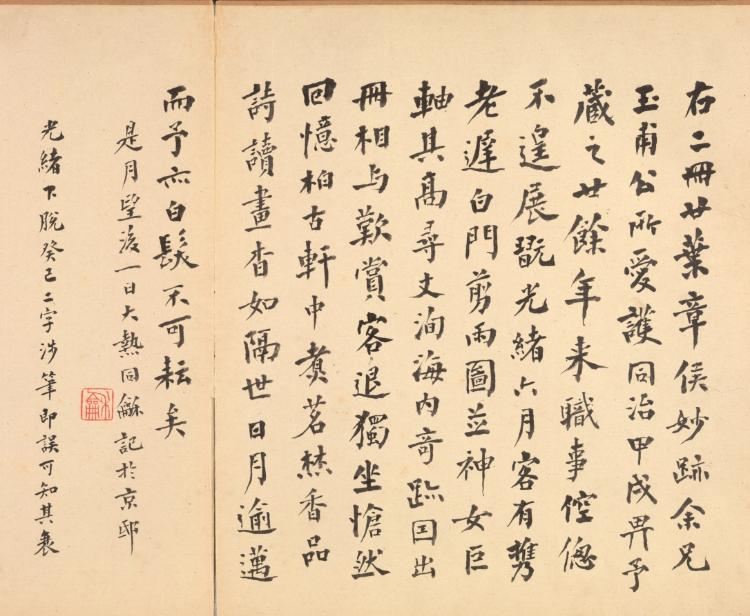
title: Paintings after Ancient Masters: Calligraphy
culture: China, Ming dynasty (1368–1644)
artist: Chen Hongshou (Chinese, 1598/99–1652)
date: 1598–1652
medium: album leaf, ink and color on silk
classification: Painting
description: The twenty paintings in this double album by Chen Hongshou include landscapes, figures, and flowers. It also has one leaf featuring a woman, an often-used subject not found in the other albums from the latter part of his career. His late works are wonderful summations of Chen's peculiar and quirky art—archaistic, hyper-refined—but without accompanying shallowness or sentimentality. His figures and landscapes in the late albums are miniaturized, not unlike the small Chinese gardens, or the carefully selected small table rocks or old roots used for contemplation to see the world in miniature. This loss of scale is quite deliberate and reflects the psychological situation of a depressed class like the Ming loyalist officials and scholars, deprived of their integrity and honor, and forced to lead a diminished and restricted existence.